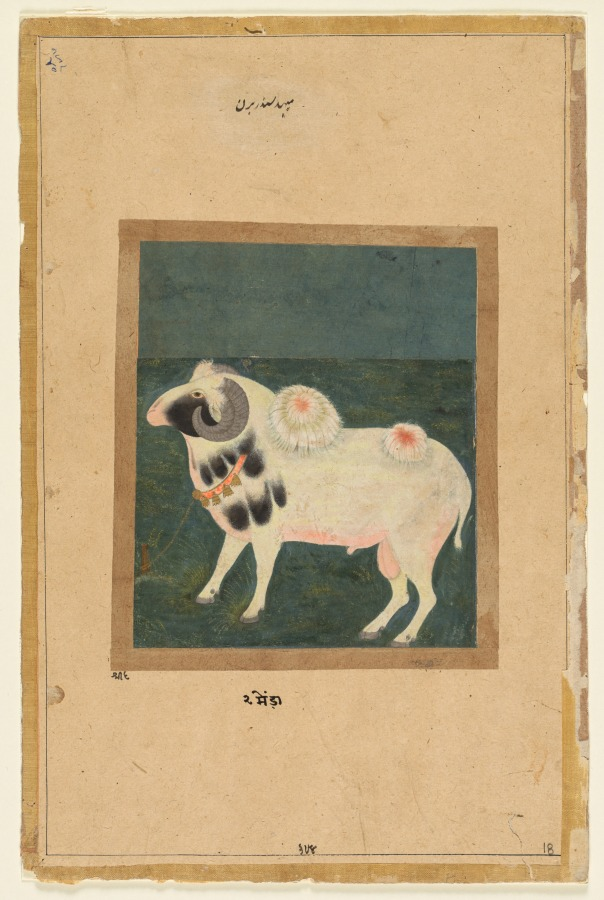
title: A royal ram with a gold chain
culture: India, Mughal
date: c. 1585; border added probably 1700s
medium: Gum tempera and gold on paper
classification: Painting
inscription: Urdu inscription at top, in nasta‘liq script: sheep; Hindi inscription under left corner of painting, in devanagari script: Shri 6; Hindi inscription below painting, in devanagari script: 2, sheep; Hindi inscription, bottom center, in devanagari script: 674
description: The ram in this painting is a particularly well-groomed animal that was probably kept in the royal menagerie and attended to by special keepers. The puffs of hair on the ram’s back have been colored with henna, and he wears a decorative chain of bells across his chest. The Mughal rulers collected and exhibited specimens of various animals from their territories out of a scientific interest as well as a desire to display the extent of their influence over the land and its inhabitants.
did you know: Sheep with black and white markings like this are called Jacob sheep.